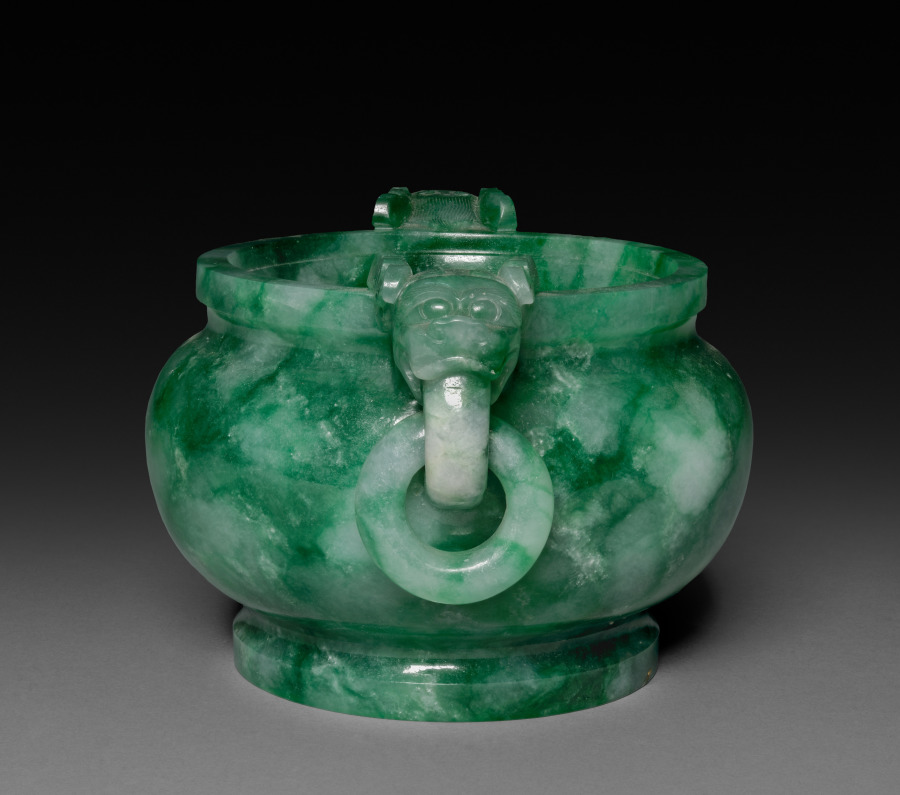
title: Incense Burner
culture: China, Qing dynasty (1644–1911), Qianlong reign (1736–95)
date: 1736–95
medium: green jade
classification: Jade